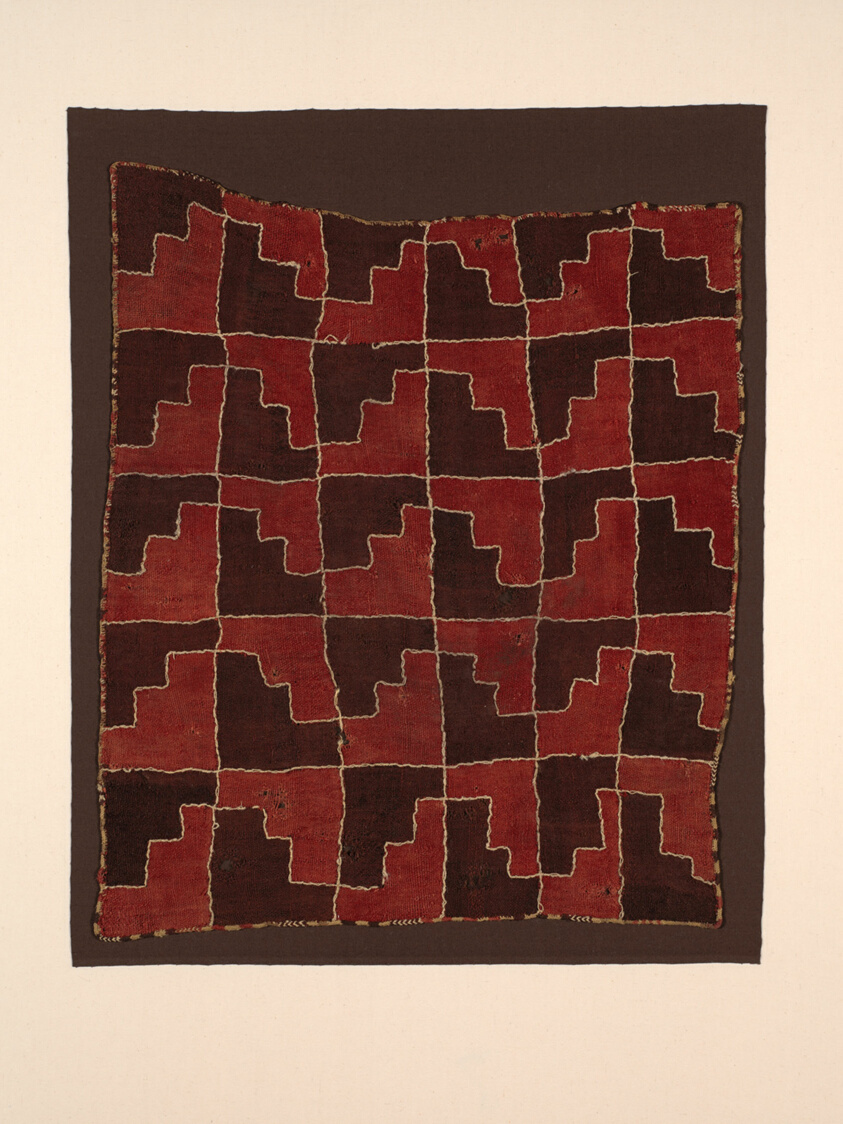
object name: Textile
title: Fragment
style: nazca, andean, andes, Pre-Columbian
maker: Nazca or Wari; Peru, south coast, Nazca Valley, Tunga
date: A.D. 200/900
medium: Wool (camelid), plain weave of discontinuous warps and wefts; embroidered in double running stitches; edged with cross-knit loop stitches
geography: Peru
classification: textile; needlework (visual works)